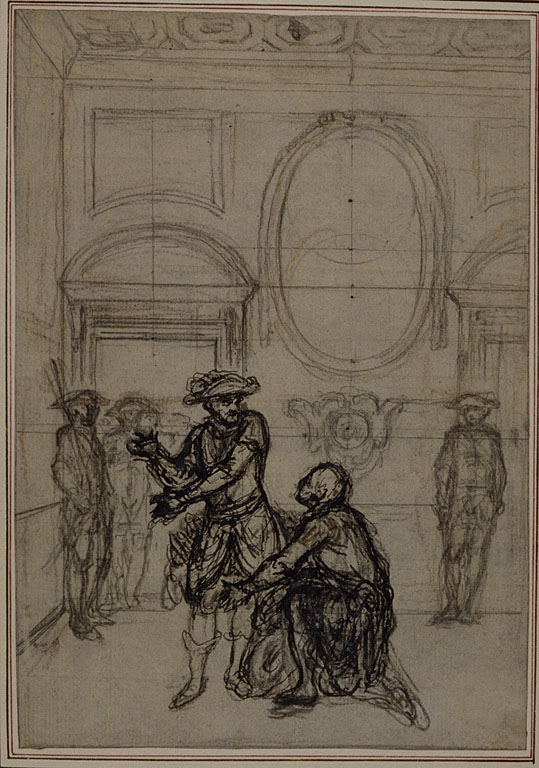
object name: Drawing and Watercolor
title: Study for a second edition, never published, of Colle's "La Partie de Chasse de Henri IV", Act I, Scene 6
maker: Hubert François Gravelot (French, 1699-1773)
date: before 1766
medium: Pen and black ink, with black chalk and brown crayon, over graphite, on pale gray laid paper, incised for transfer and perimeter mounted on ivory laid paper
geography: France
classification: graphite; drawings (visual works); prints and drawing